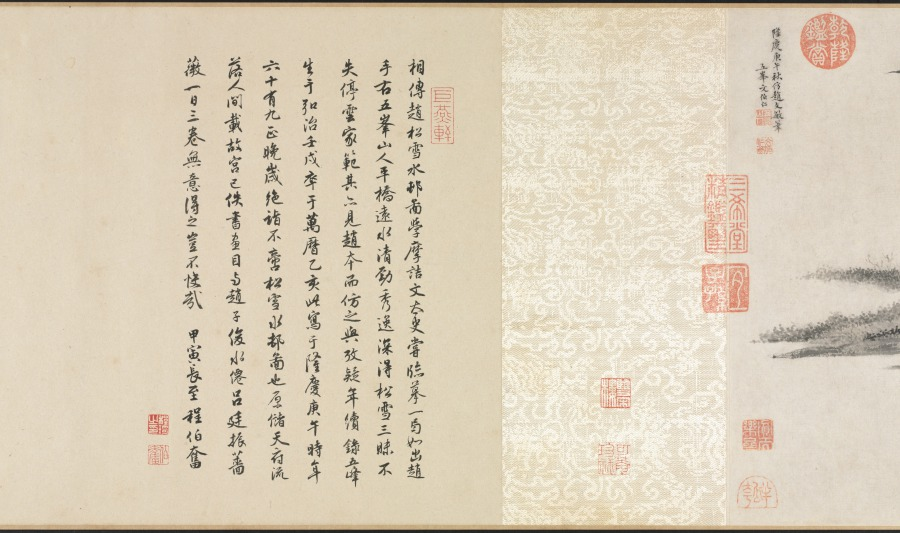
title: Water Village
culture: China, Ming dynasty (1368–1644)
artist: Wen Boren (Chinese, 1502–1575)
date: 1570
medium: handscroll; ink and light color on paper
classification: Painting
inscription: 隆慶庚午秋仿趙文敏筆. 五峰文伯仁 [印] 五峰山人; 文伯仁印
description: In the autumn of 1570, Wen Boren painted this seemingly unemotional scene of low-lying marshlands with a chain of rounded mountains in the background. A fishing boat is nestled on the shore near the village. Although paths and bridges traverse the landscape, only two people are visible in the stillness. From the restrained atmosphere of this landscape, one would never guess that Wen Boren was known as the “bad boy” of the Wu School for his explosive temper. As a younger man, he was even embroiled in a contentious lawsuit with his own uncle, Wen Zhengming (1470–1559), a master of Ming dynasty painting with whom he had trained. The ideal of the scholar-painter, or literati, was that an artist’s moral character is reflected in his paintings, so there was great incongruity between Wen Boren’s difficult personality and his restrained landscapes. A contemporary, Wang Shizhen, wrote this about him: "This gentleman is prone to behave odiously and screamed accusations at people. How is it possible for him to carry in his bosom such a wealth of scenic wonders?" Who knows what effort it took to subdue his fractious spirit to project an image of coolness and refined taste in his paintings?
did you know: A foreground tree has an eccentric twisting silhouette and pepper-dot "halo" of leaves.